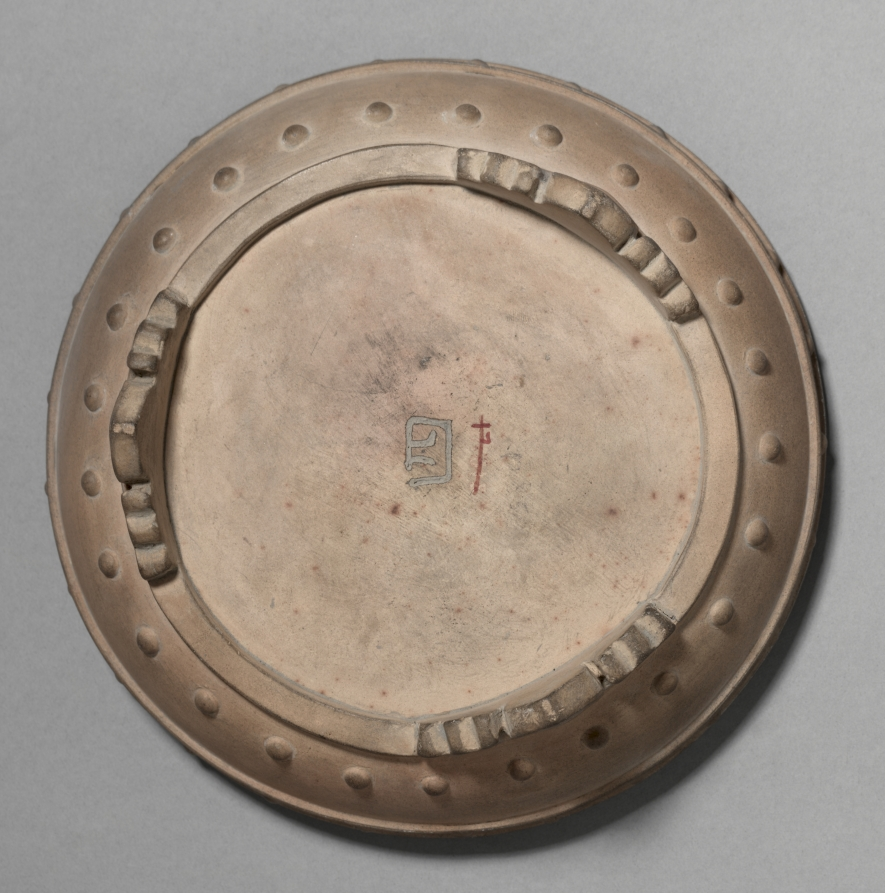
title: Bulb Bowl: Jun Type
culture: Northern China, Song dynasty (960-1279)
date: 960–1279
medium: unglazed ceramic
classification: Ceramic